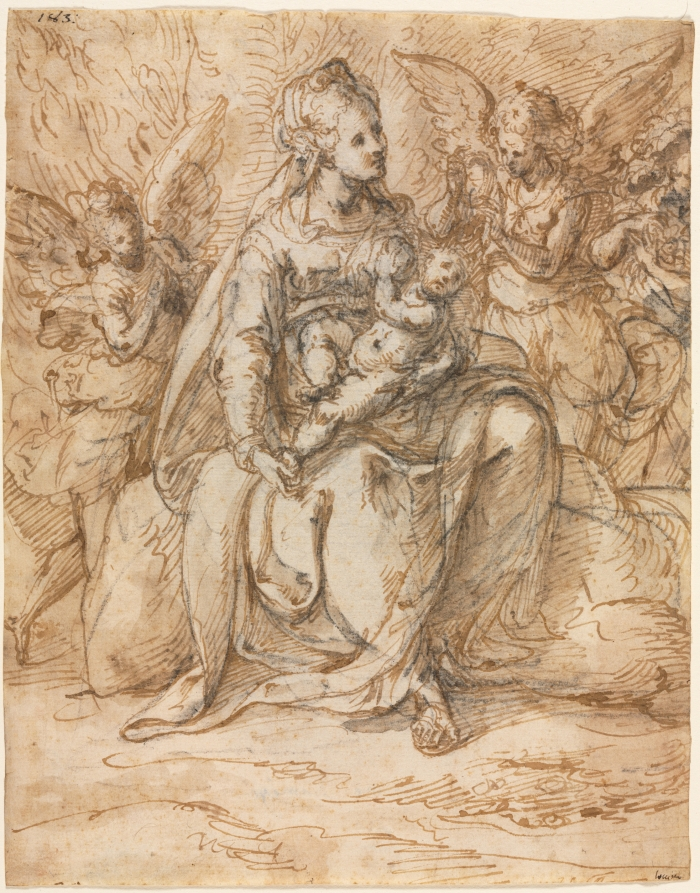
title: Madonna and Child with Angels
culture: Italy, 16th century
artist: Aurelio Luini (Italian, 1530–1593)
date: late 1500s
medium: pen and brown ink and brush and brown wash over black chalk (extended with brush and water in places); pricked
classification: Drawing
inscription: upper left, in black ink: 183: ; lower right, in black ink: Luino ; VERSO, upper right, in brown ink: Aurelio Lupin. ; lower center, in brown ink: Gio ane Fiamig[r?]o ; lower left, in black ink: 9311. ; upper center, in graphite: 20 ; throughout center, in graphite: [illegible] ; lower center, in graphite: G[illegible] [erased] / G[illegible] [erased] ? ; lower right, in graphite: 85[7?]